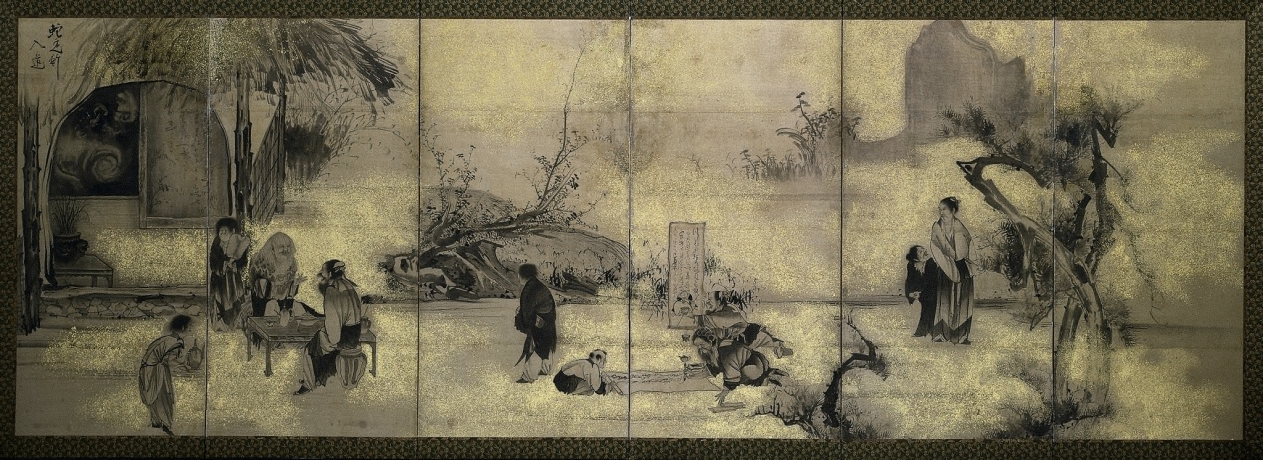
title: The Eight Immortals of the Wine Cup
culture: Japan, Edo period (1615–1868)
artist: Soga Shōhaku (Japanese, 1730–1781)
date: later 1700s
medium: Six-panel folding screen, ink and cut-gold foil on paper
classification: Painting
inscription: signature, lower right corner.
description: Responding to the desires of the middle class (chonin), some Japanese painters of the late Edo period moved away from the seriousness associated with the Chinese theme of reclusion, focusing instead on the motif’s humorous aspects. The theme Eight Immortals of the Wine Cup is based on a poem by the renowned 8th-century Chinese poet Du Fu about his eight colleagues. These scholars eagerly sought release from their official governmental duties and then supposedly fled the capital for the countryside. There, they engaged in wildly eccentric behavior and adventurous creative work, all fueled by copious amounts of wine. Shohaku’s version of events exaggerates the scholars’ pleasure, as seen in their comical facial expressions.